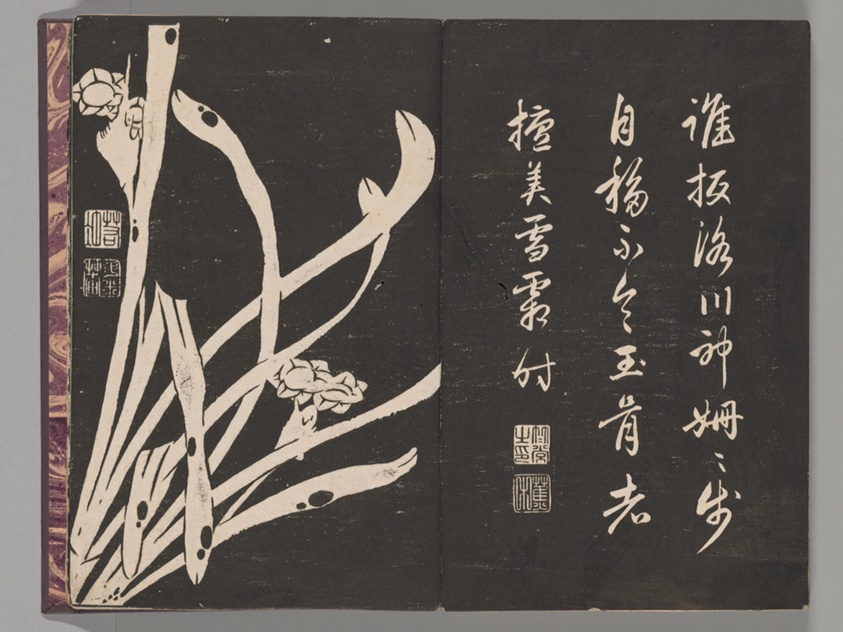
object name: Book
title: Soken sekisatsu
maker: Ito Jakuchu (Japanese, 1716-1800)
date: 1767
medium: Woodblock printed book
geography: Japan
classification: book